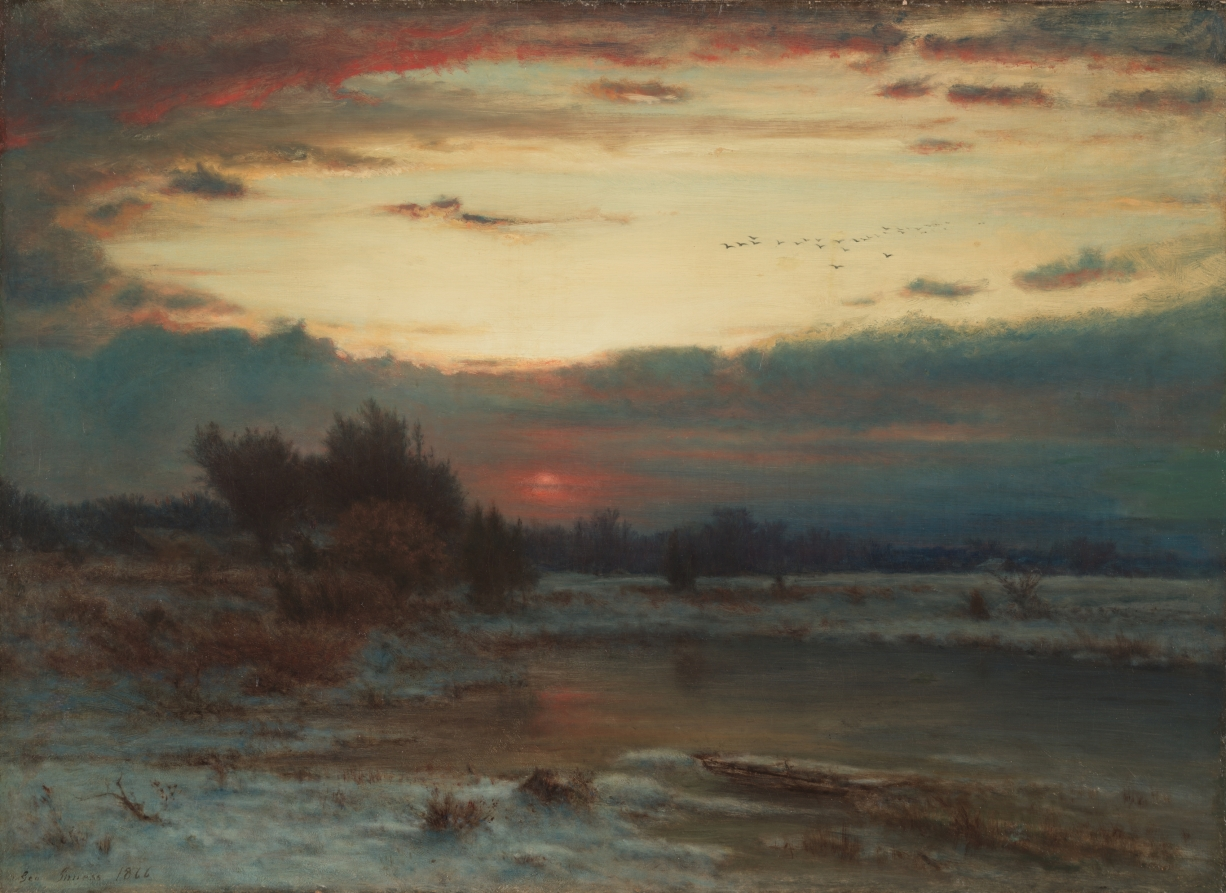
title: A Winter Sky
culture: America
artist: George Inness (American, 1825–1894)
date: 1866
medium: oil on canvas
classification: Painting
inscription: signed lower left: Geo Inness 1866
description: In A Winter Sky, George Inness concentrated on depicting the effects of light and atmosphere. In this composition, the artist combined a vibrant, glowing sunset with a harsh, bleak landscape. Inness's color choice reinforces this contrast, as the warm pinks and yellows in the sky play off the cool blues of the frozen ground.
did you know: George Inness originally included a figure standing at the left edge of the pond, which he later painted over so that it is no longer visible.